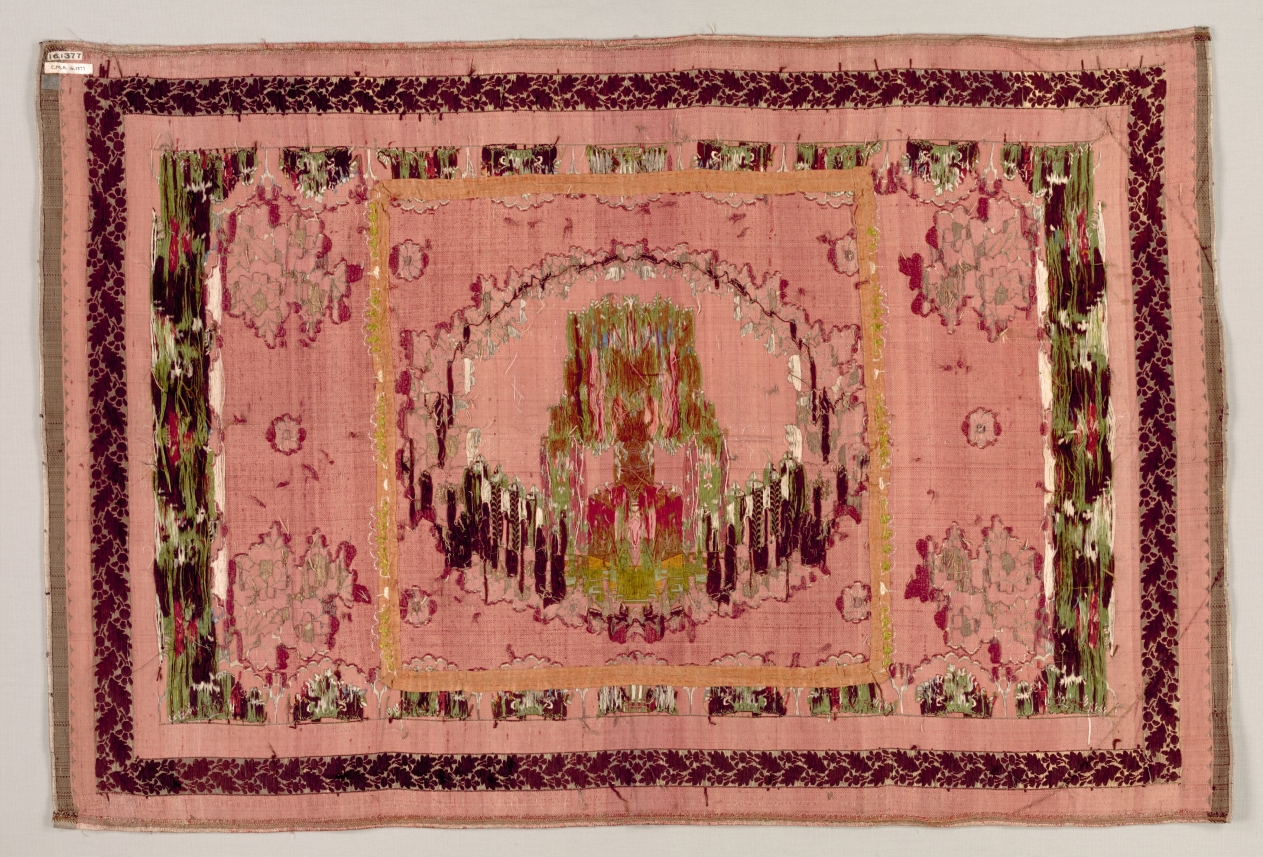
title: Embroidered Table Cover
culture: Turkey, Hereke, early 19th century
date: early 19th century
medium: brocade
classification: Textile